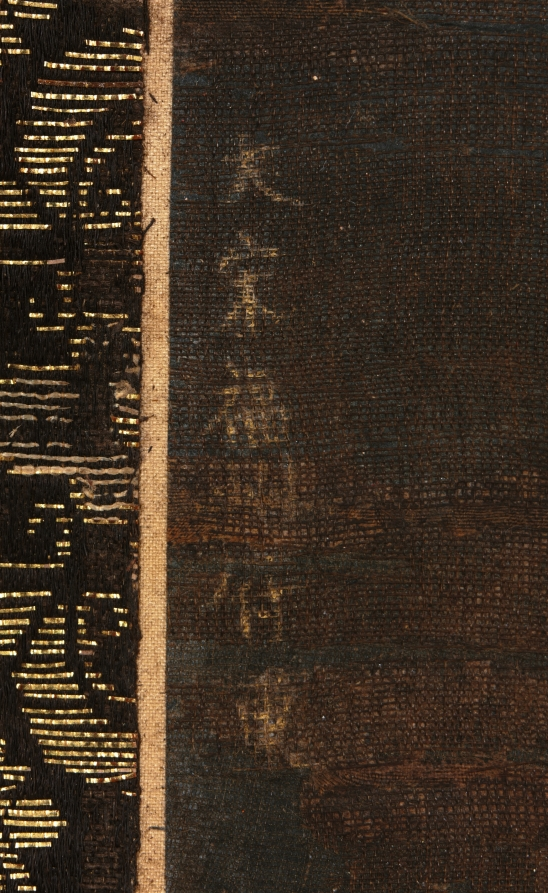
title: Shakyamuni Triad: Buddha Attended by Manjushri and Samantabhadra (Buddha)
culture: China, Fuzhou, Fujian Province, Yuan dynasty (1271-1368)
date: late 1300s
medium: Hanging scroll; ink and color on silk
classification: Painting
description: This triptych is a rare example of Yuan Buddhist painting. It depicts the historic Buddha Shakyamuni flanked by two attending bodhisattvas, Manjushri (the bodhisattva of wisdom, riding a lion) and Samantabhadra (the bodhisattva of universal virtue, riding an elephant). Below them are others seeking enlightenment: two disciples of the Buddha (Ananada and Kasyapa), two non-Chinese people, a boy with topknots, and a female worshiper. The clouds above and around the divine beings form one scene that illustrates Shakyamuni’s sermon from the Lotus Sutra. This text became an important basis for Buddhist faith throughout East Asia and was central to the Mahayana school of Buddhism.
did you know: Shakyamuni is seated cross-legged on the throne with the hand gesture (mudra) of giving instruction.